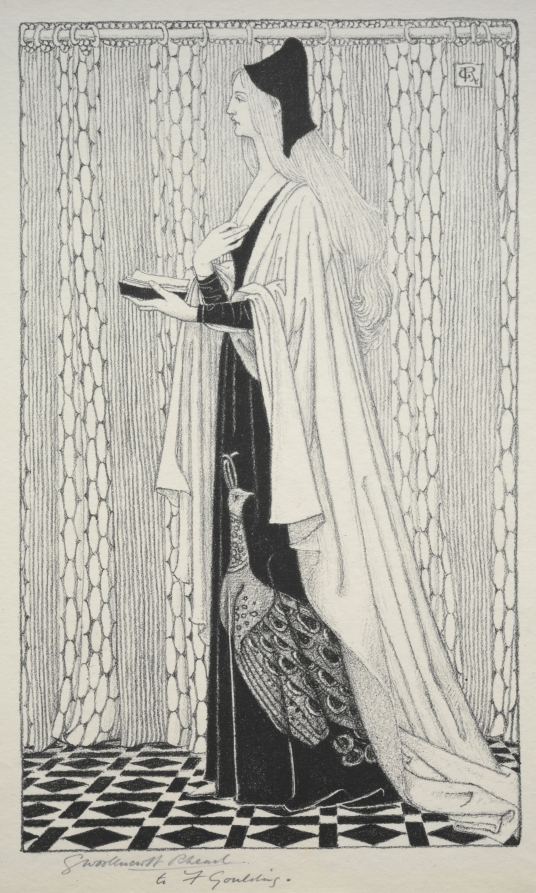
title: Costume Study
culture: England, 19th-20th century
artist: George Woolliscroft Rhead (British, 1855–1920)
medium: lithograph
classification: Print